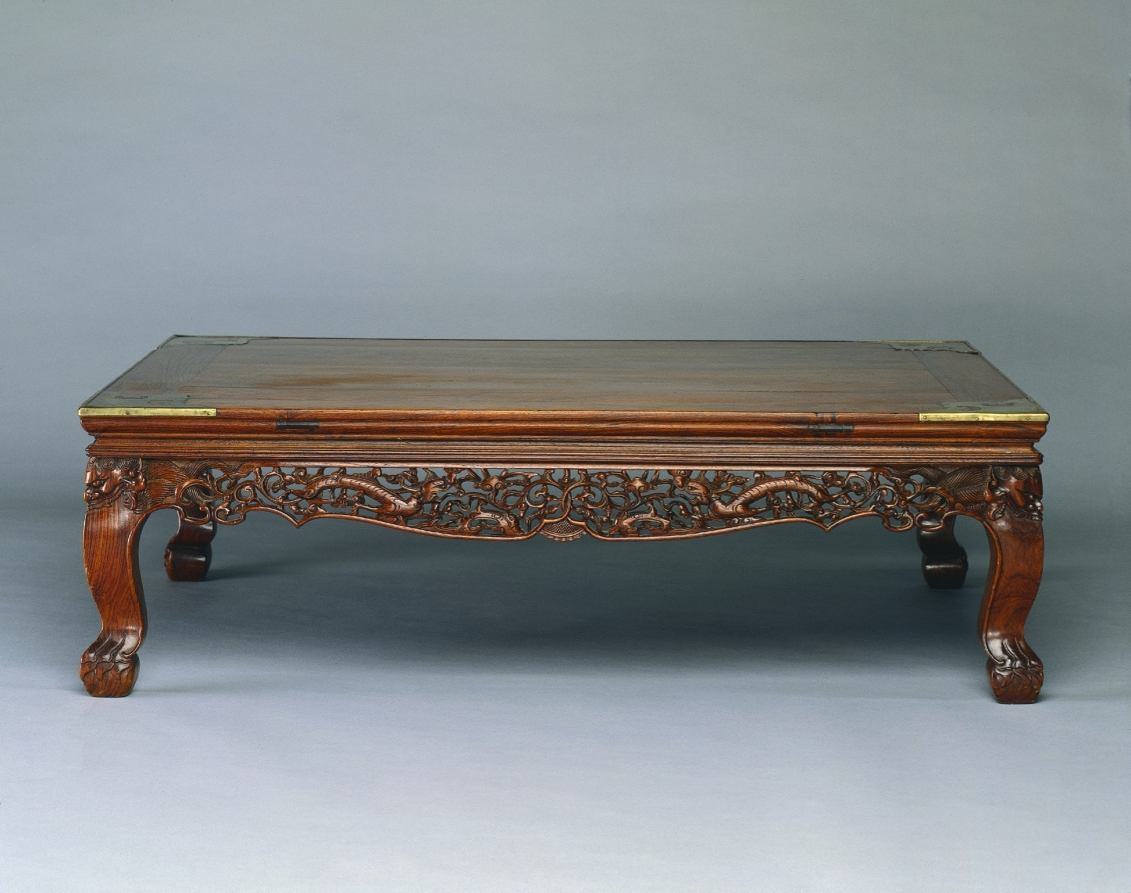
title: Low Table (kang zhuo) with Dragons in Clouds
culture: China, Ming dynasty (1368-1644) or Qing dynasty (1644-1911)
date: 1600s–1700s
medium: Rosewood (huanghuali) and metal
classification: Furniture and woodwork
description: Originally, low tables were placed on a kang, a raised platform made of brick and heated by a fire underneath, which served as a bed and living space on cold winter days in northern China. During the daytime, these platforms could accommodate two sitters with a kang table placed between them. In the warmer south, kang tables were used on daybeds made of wood. By the Ming and Qing dynasties, furniture makers used rare tropical hardwood, such as huanghuali, known as rosewood.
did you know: Note the curved legs, the elaborate openwork carving, and metal-fitted corners in the form of bats.